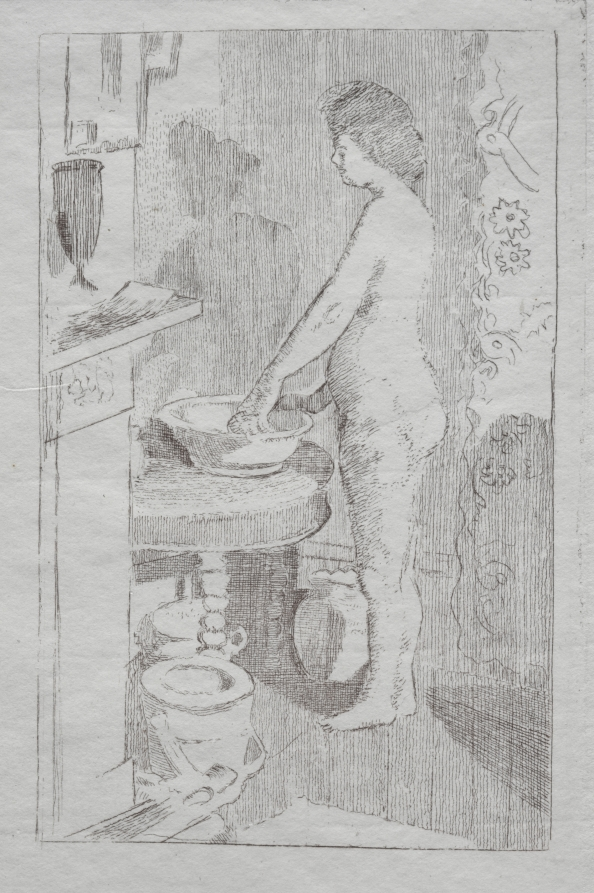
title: Sally: The Small Plate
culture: England, 20th century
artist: Walter Sickert (British, 1860–1942)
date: c. 1911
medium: etching printed in brown ink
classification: Print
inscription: annotated in graphite along the lower margin and upper right corner